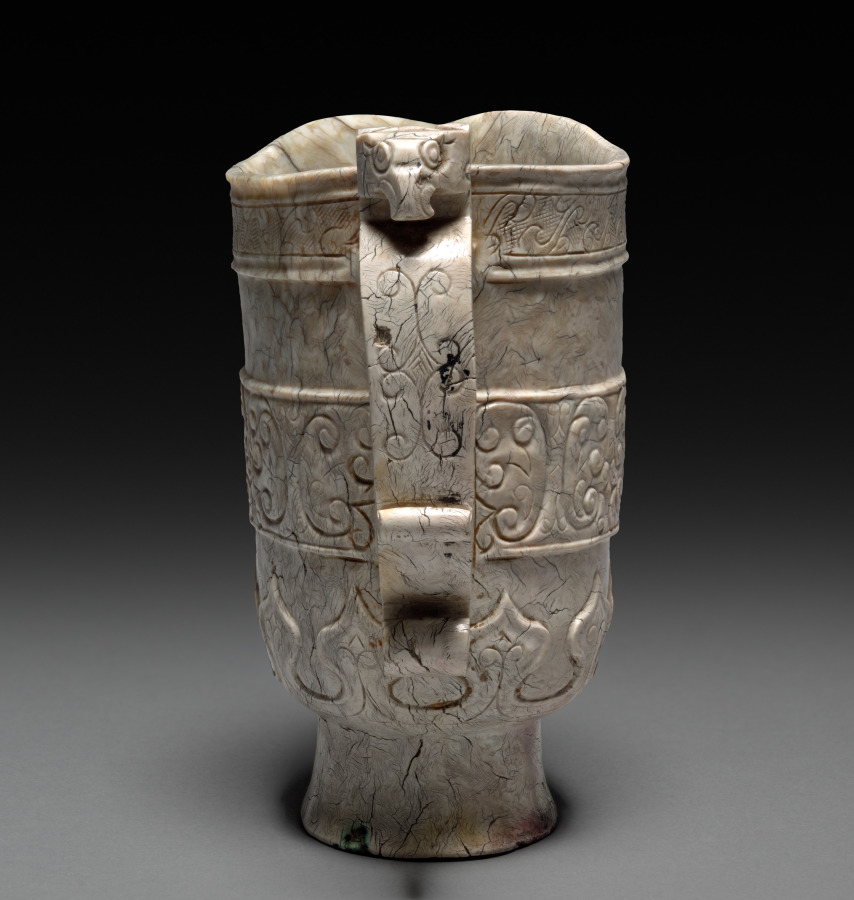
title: Ewer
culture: China, Ming dynasty (1368–1644)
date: 1700s or later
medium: jade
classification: Jade